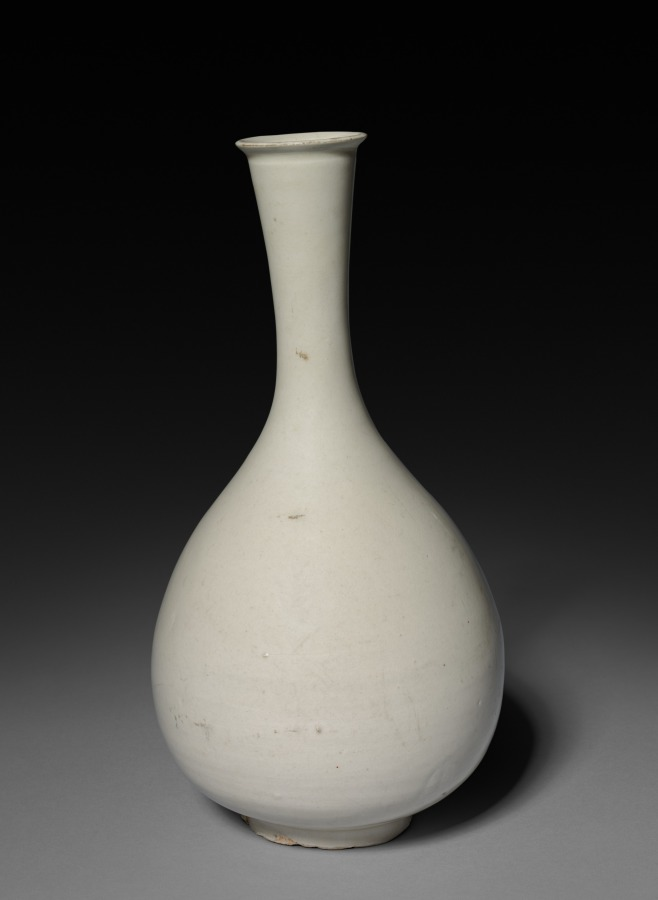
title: Bottle Vase: Ding ware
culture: China, Jin dynasty (1115-1234)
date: 12th Century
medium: glazed white porcelain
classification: Ceramic